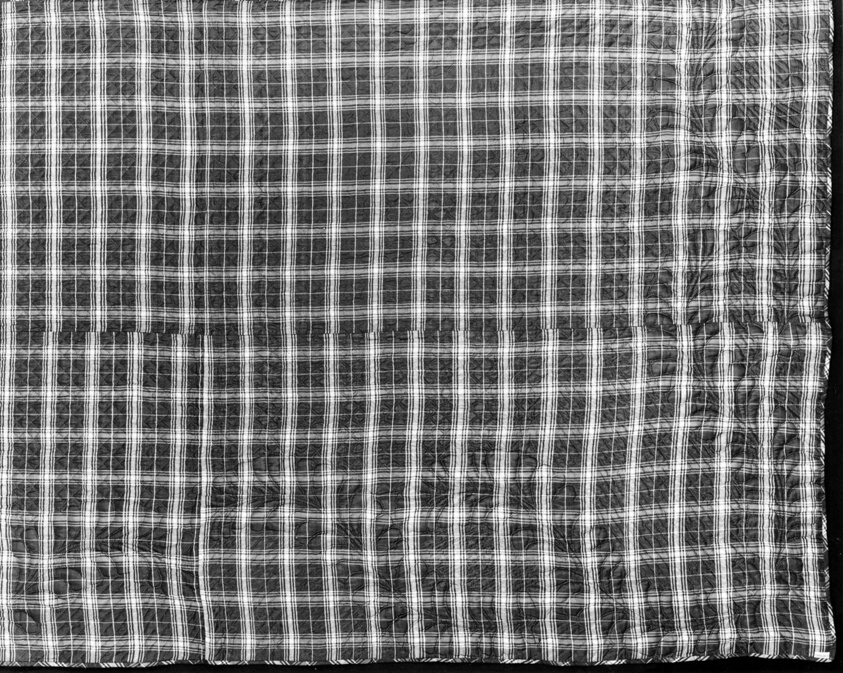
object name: Textile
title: Bedcover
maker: Marcy B. Bert (American, active 1852; United States, Pennsylvania, Lancaster County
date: 1852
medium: Silk, plain weave; backed with pink cotton, plain weave, glazed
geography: Pennsylvania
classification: textile; needlework - quilt